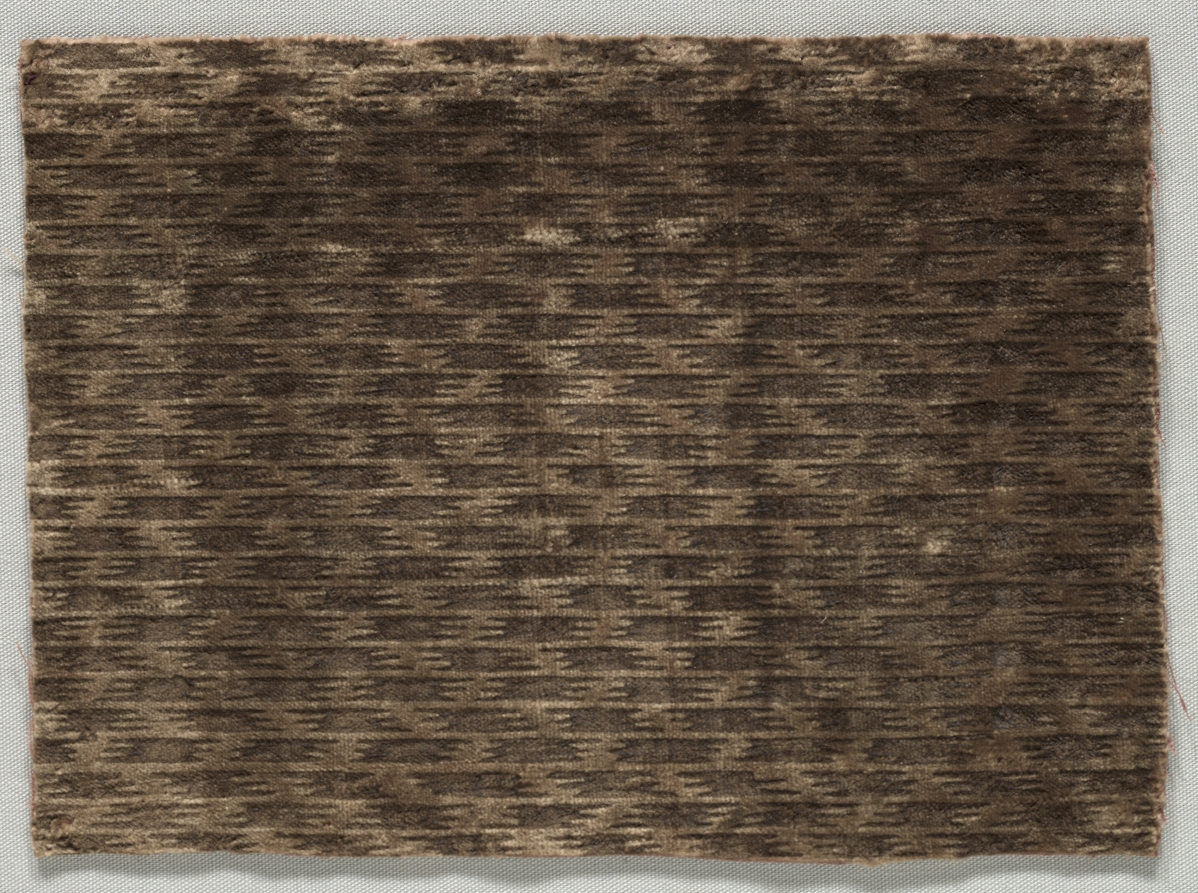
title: Velvet Fragment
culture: Italy, 18th century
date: 1700s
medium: velvet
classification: Velvet